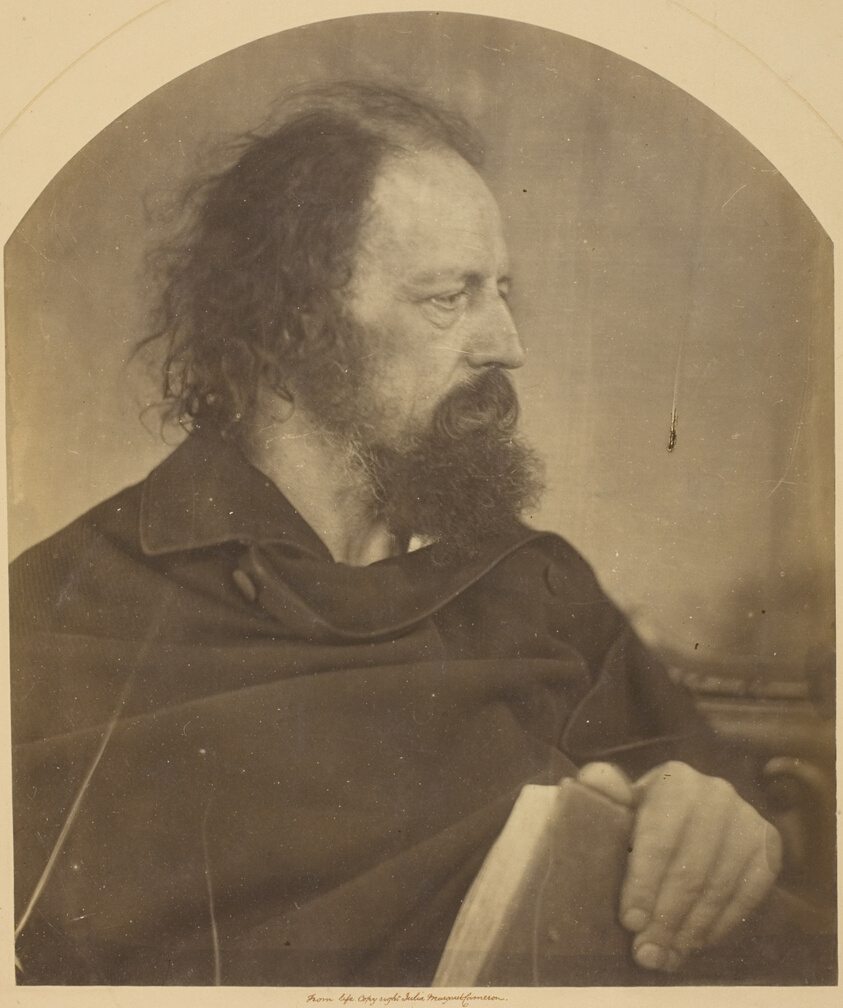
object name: Photograph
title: The Dirty Monk, Alfred Tennyson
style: 19th century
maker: Julia Margaret Cameron (English, 1815–1879)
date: 1865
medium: Albumen print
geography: England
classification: albumen silver print; photographic process; photography; photograph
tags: portraits, portraits: male subject, photography